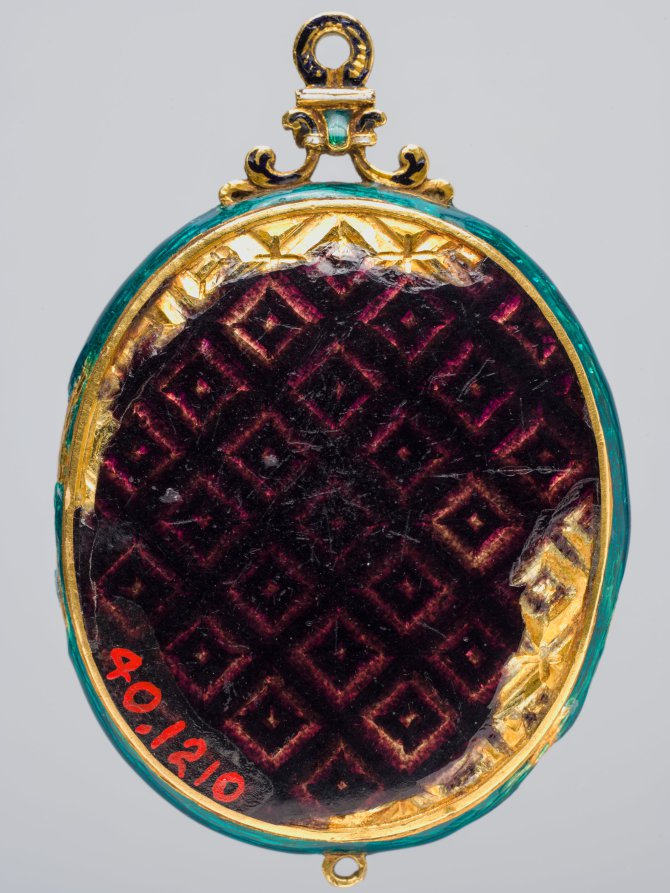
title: Portrait of a Woman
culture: England, 16th century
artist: Nicholas Hilliard (English, c. 1547–1619)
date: c. 1593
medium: watercolor on vellum in a gold and enamel locket frame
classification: Portrait Miniature